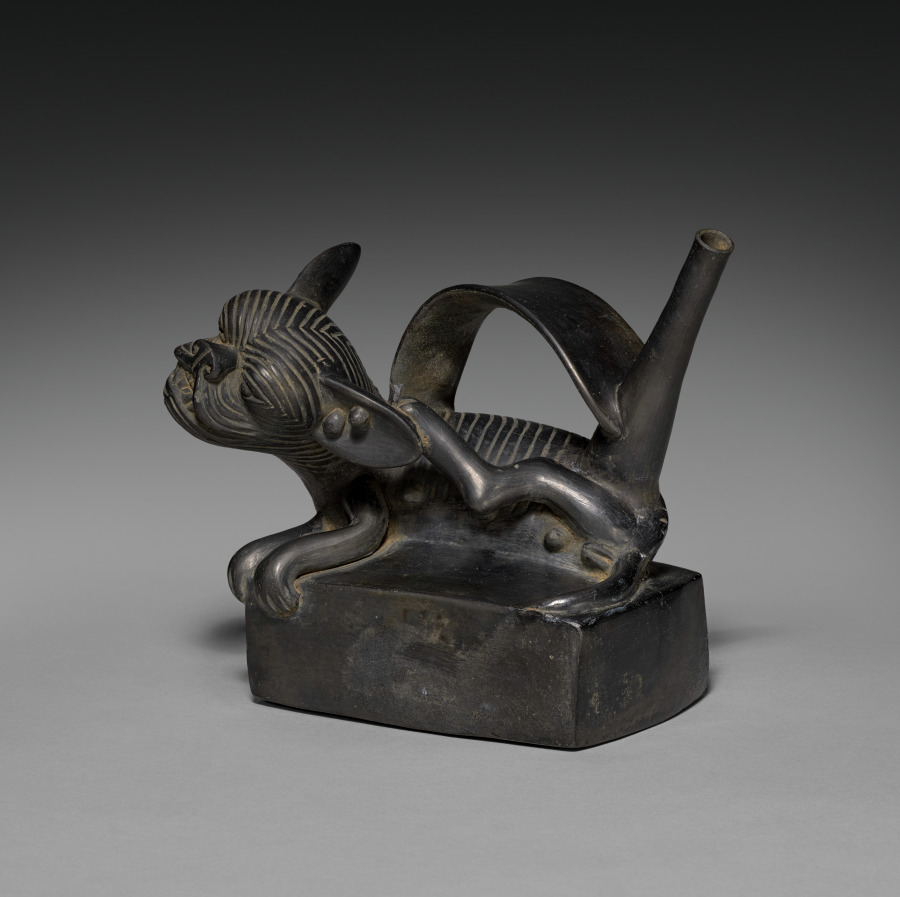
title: Vessel with Reclining Dog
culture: Central Andes, North Coast, Chimú-Inka style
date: 1470–1532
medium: ceramic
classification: Ceramic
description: This vessel represents a Peruvian hairless dog who has recently given birth and seems to be taking a break from maternal obligations. The meanings of such dogs may be connected to the trade networks that brought them to Peru from Mexico in the late pre-Hispanic period. Perhaps these foreign ties made them prestige animals whose breeding engendered further status for the owner.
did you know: This vessel represents a Peruvian hairless dog who has recently given birth.